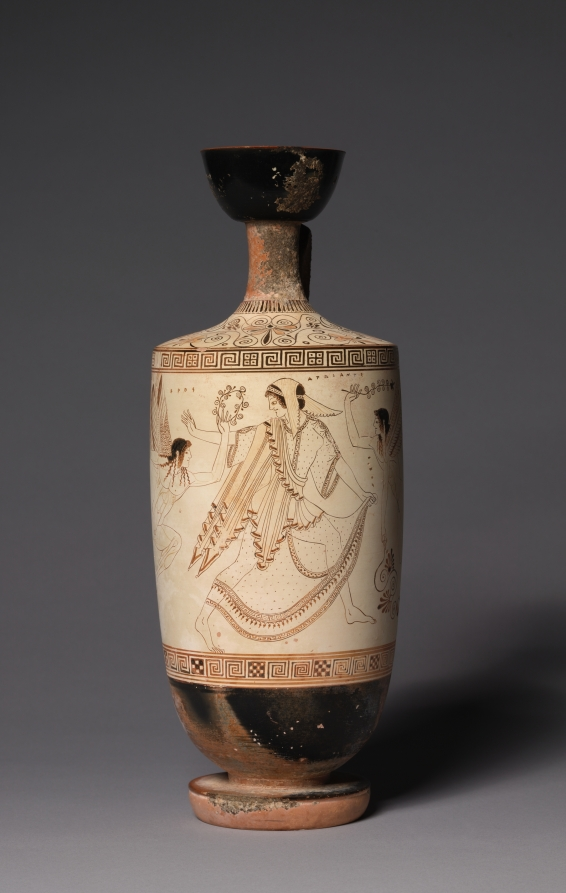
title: White-Ground Lekythos (Oil Vessel): Atalanta and Erotes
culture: Greek, Attic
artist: attributed to Douris (Greek, Attic, active c. 500–470 BCE)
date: 500–490 BCE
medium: ceramic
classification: Ceramic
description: Known as "white-ground" because of the white clay slip applied as a surface for figural decoration, vases of this type give some idea of the appearance of lost ancient large-scale wall paintings. Both remarkably well preserved and masterfully composed, the images cover the entire circumference of the vase. At the center, Atalanta, the virgin huntress renowned for both her speed and her opposition to marriage, races to the right while looking back at Eros, the winged god of love; both figures are named. This Eros, bounding forward, tries to crown her, while two additional Erotes (also named) further hem her in. Love will win.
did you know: Eros, god of love, appears three times on this vase.